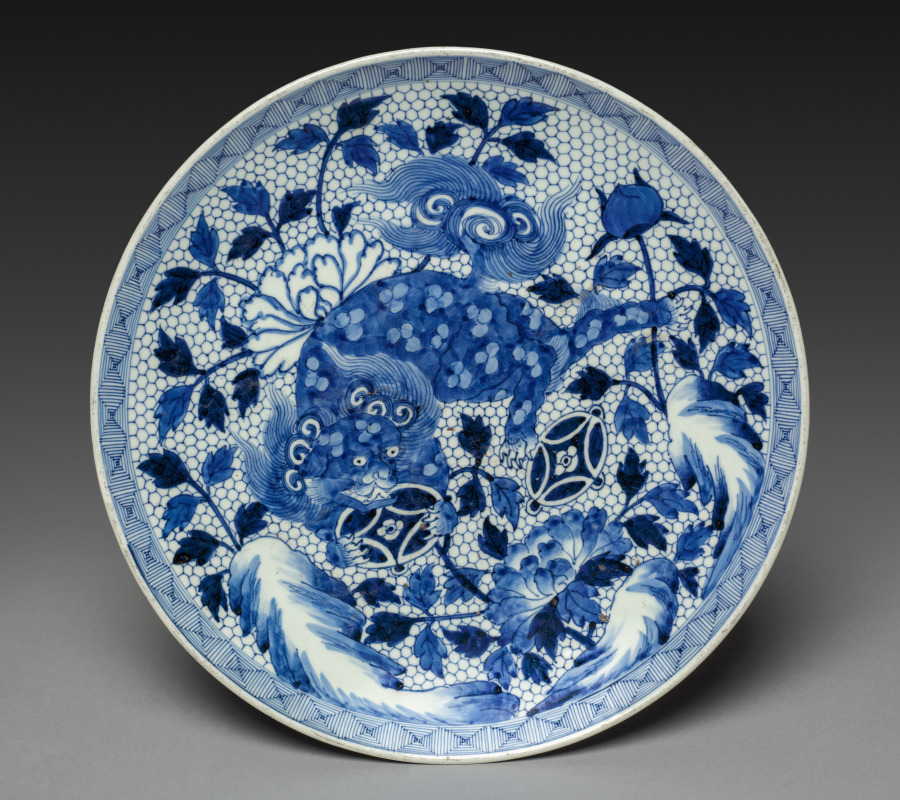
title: Dish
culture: Japan, Edo period (1615–1868)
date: early to mid-1800s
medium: porcelain with underglaze blue (Hizen ware, Kutani type)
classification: Ceramic